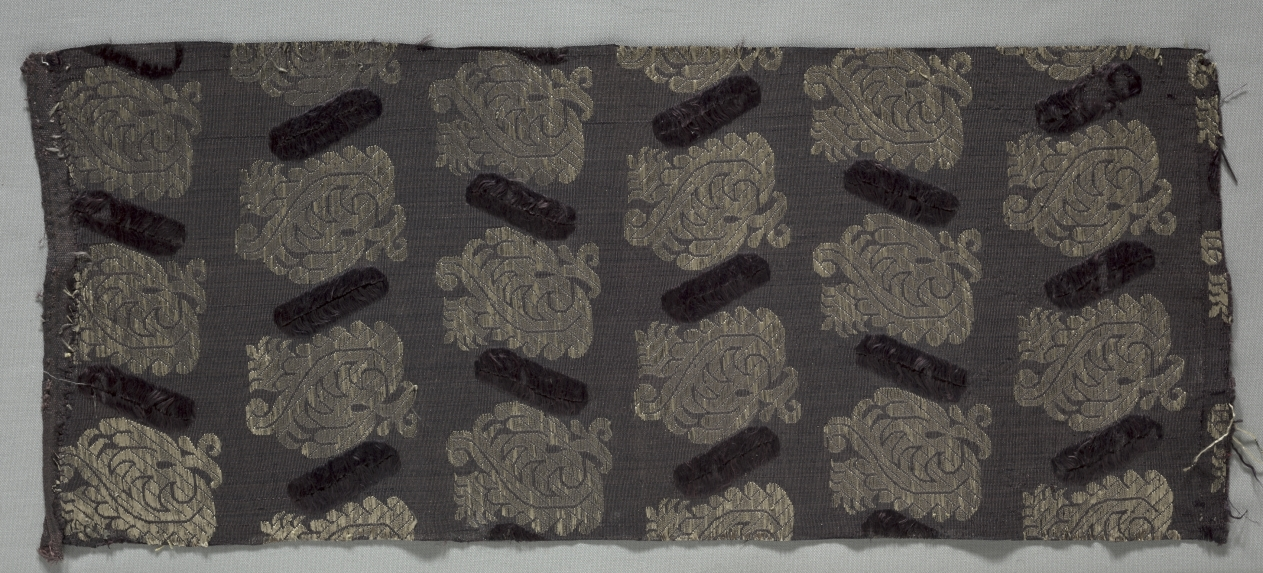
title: Brocaded Silk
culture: Italy, 17th century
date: 1600s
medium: brocade; silk and metal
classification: Textile